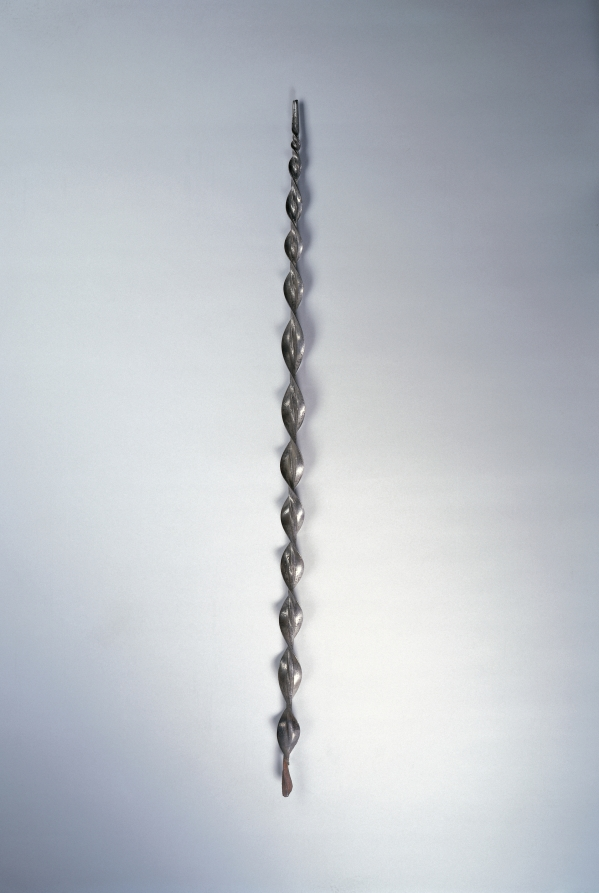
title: Sword (Laughing Head in Grotesque Hat for Hilt)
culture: Italy, 17th century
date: 1600s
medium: steel and bronze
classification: Arms and Armor